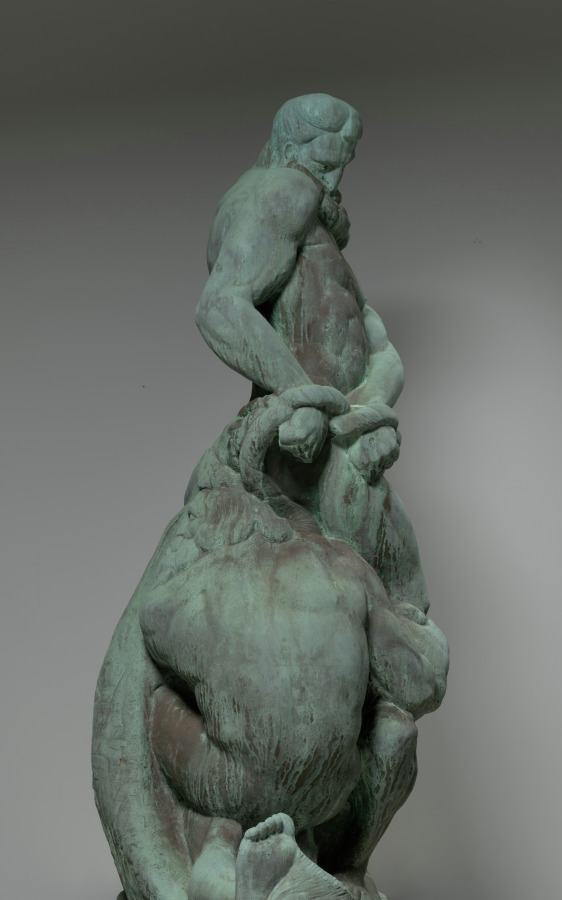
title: The City Fettering Nature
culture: America, Ohio, Cleveland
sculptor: Alexander Blazys (American, born Russian Empire [now Lithuania], 1894–1963)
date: 1927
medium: bronze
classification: Sculpture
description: Alexander Blazys, a Lithuanian immigrant, became a leading sculptor in Cleveland during the 1920s, when he created The City Fettering Nature for the Cleveland Museum of Art’s grounds. In this composition, Utility and Beauty, two characteristics of the city, are shown as intertwined figures attempting to subdue Nature’s power. The brawny figure of Nature, still standing despite this attack, struggles to free himself from the restraints.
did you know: This monumental bronze sculpture weighs 1,500 pounds and requires a crane to install.